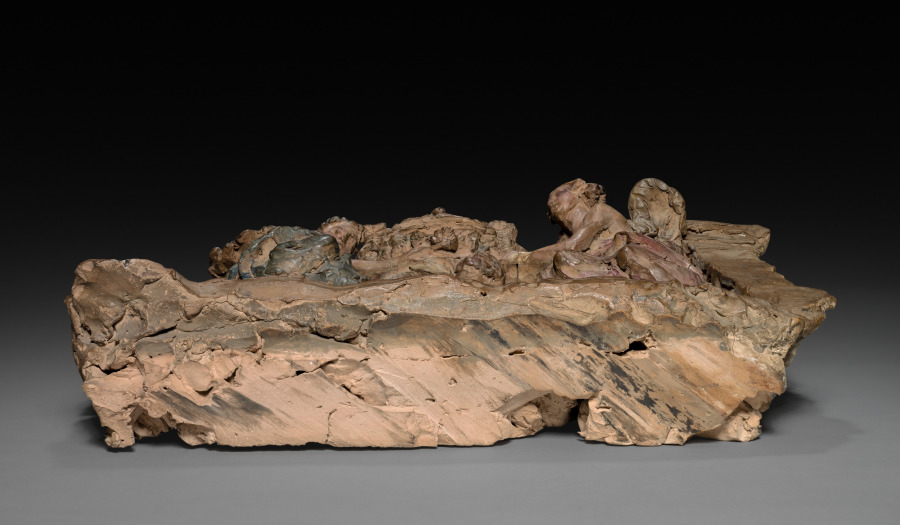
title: Two Angels and Cherubs Bearing an Icon of Christ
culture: Italy, Rome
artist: probably by Paolo Naldini (Italian, 1616–1691)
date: c. 1670–80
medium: terracotta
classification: Sculpture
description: This work is probably a study for a large altarpiece that would have combined several materials, including marble, stucco, and paint. The artist modeled his design in soft clay, which was then hardened by firing; subtle tints suggest the richness of the finished work. The idea of using sculptural figures to support a painted image within an altarpiece was influenced by the work of the Roman sculptor Gian Lorenzo Bernini (1598–1680), with whom Naldini is known to have worked.